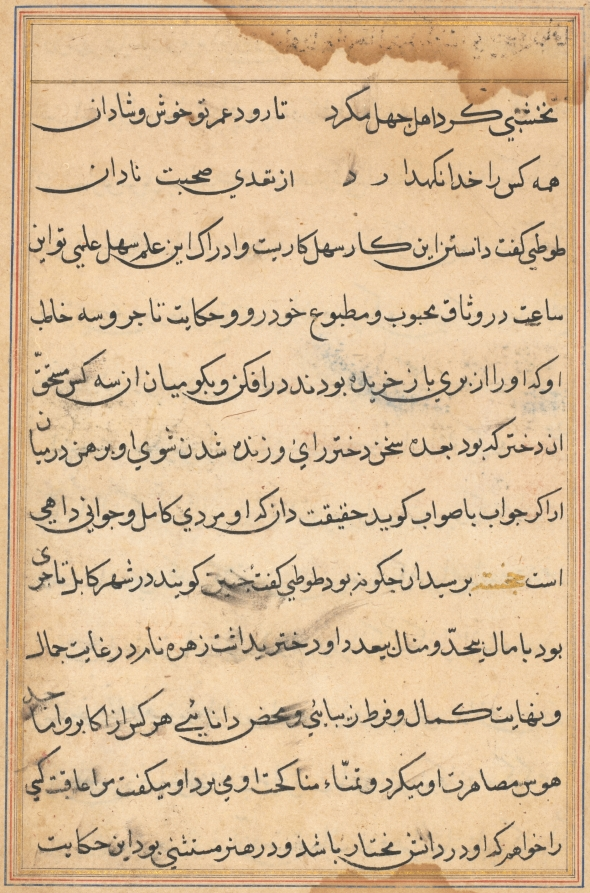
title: Page from Tales of a Parrot (Tuti-nama): text page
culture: Mughal India, court of Akbar (reigned 1556–1605)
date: c. 1560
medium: gum tempera, ink, and gold on paper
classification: Painting